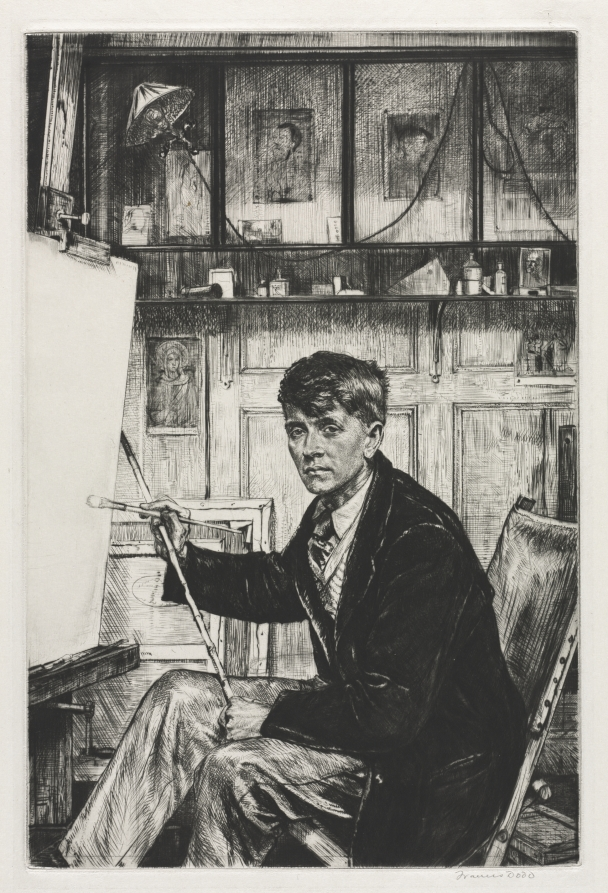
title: Charles Cundall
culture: England, 20th century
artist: Francis Dodd (British, 1874–1949)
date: 1926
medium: drypoint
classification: Print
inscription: Lower margin, in graphite: Francis Dodd